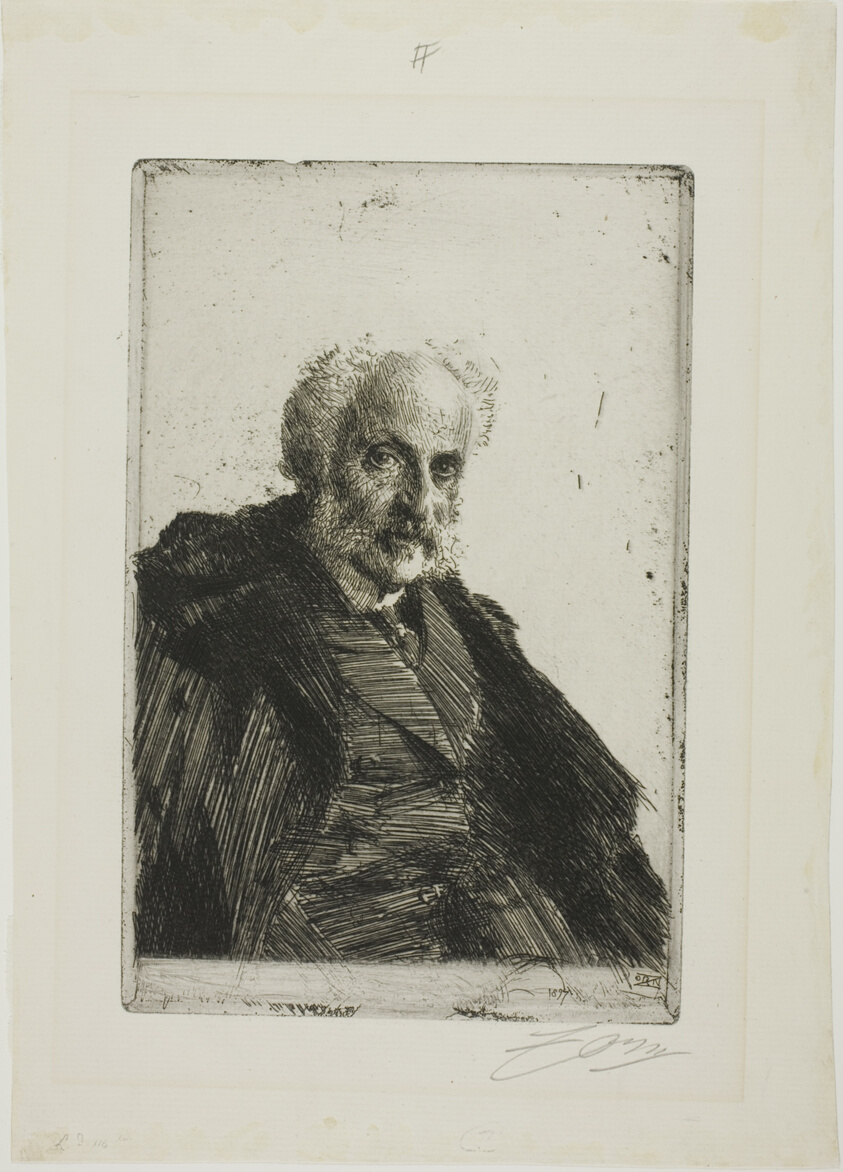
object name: Print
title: S. Loeb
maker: Anders Zorn (Swedish, 1860-1920)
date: 1897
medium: Etching on ivory laid paper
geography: Sweden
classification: etching; print; prints and drawing